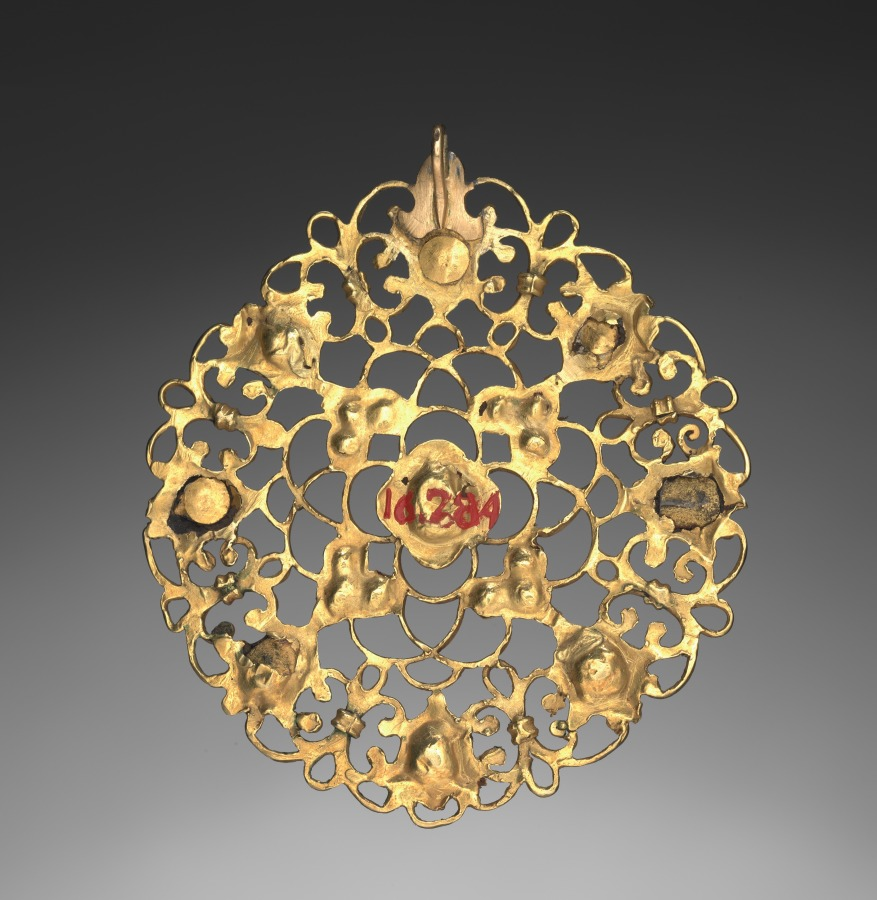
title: Medallion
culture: India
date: 1800s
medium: silver gilt with rubies and emeralds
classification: Jewelry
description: Circular ornaments were worn as pendants, sewn onto textiles, or pinned into hair. The decorative motif made of colorful gems depicting flowering plants was introduced during the reign of the Mughal emperor Shah Jahan (1628–58) and remained popular through the 1800s.